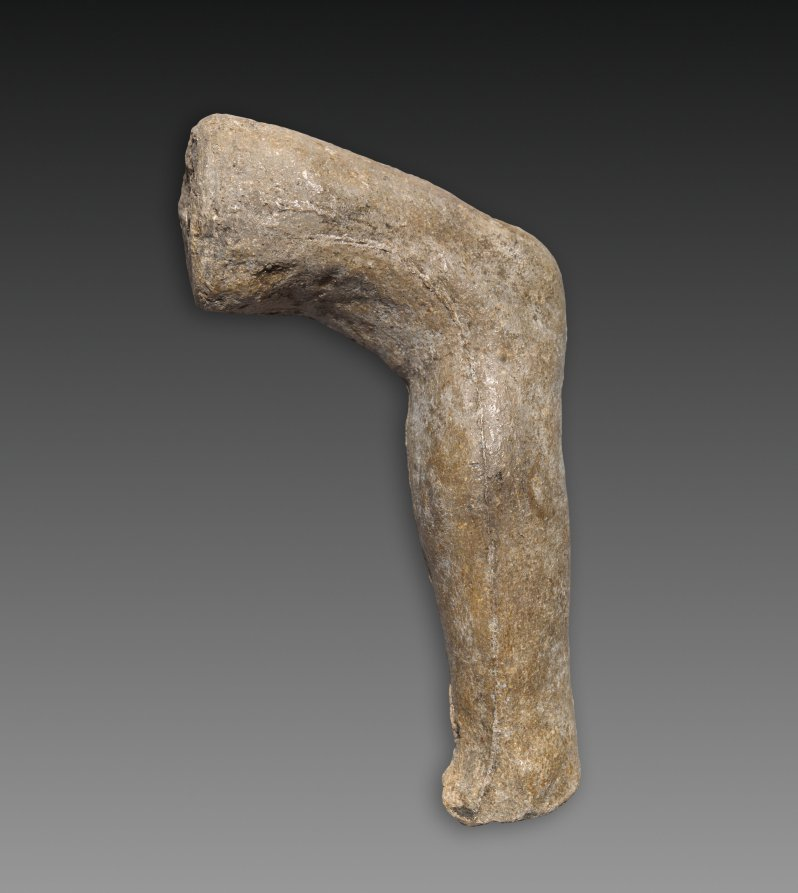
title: Fragment of a Leg (right leg)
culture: France, late 19th-early 20th Century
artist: Auguste Rodin (French, 1840–1917)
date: c. 1880 – 1917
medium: plaster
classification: Sculpture